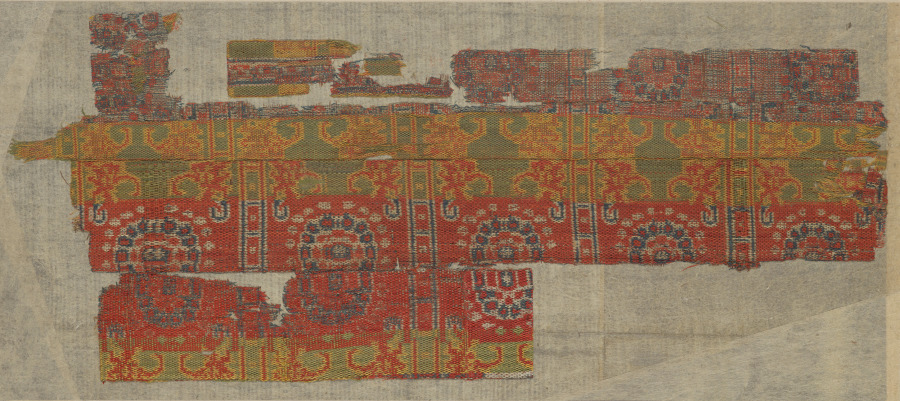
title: Fragment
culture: China, 6th - 7th century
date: 500–600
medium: tabby weave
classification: Textile